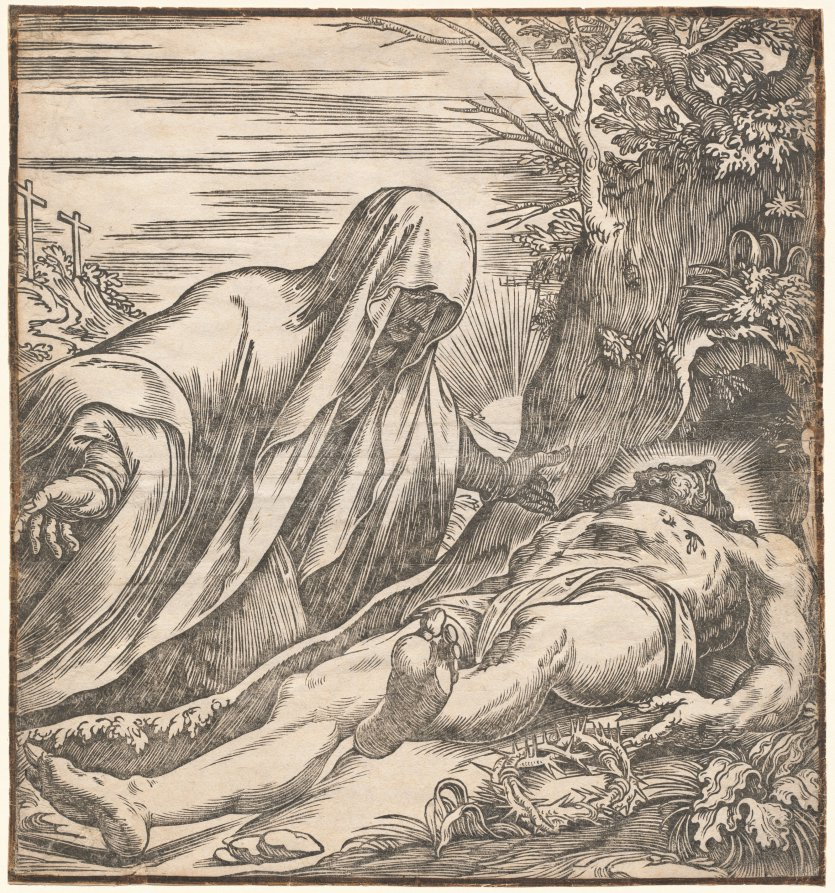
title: Lamentation over the Body of Christ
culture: Italy, 16th century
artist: Giuseppe Scolari (Italian)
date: late 1500s–early 1600s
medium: woodcut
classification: Print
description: Venice was an important center for the production of woodcuts during the 1500s. Titian (1488-1576), the celebrated Venetian painter, exerted tremendous influence on the graphic arts. His vibrant, monumental woodcut designs inspired generations of artists, including Giuseppe Scolari, who is known today only through a handful of woodcuts. The dramatic composition and the bold linear treatment are characteristic of Scolari's style.